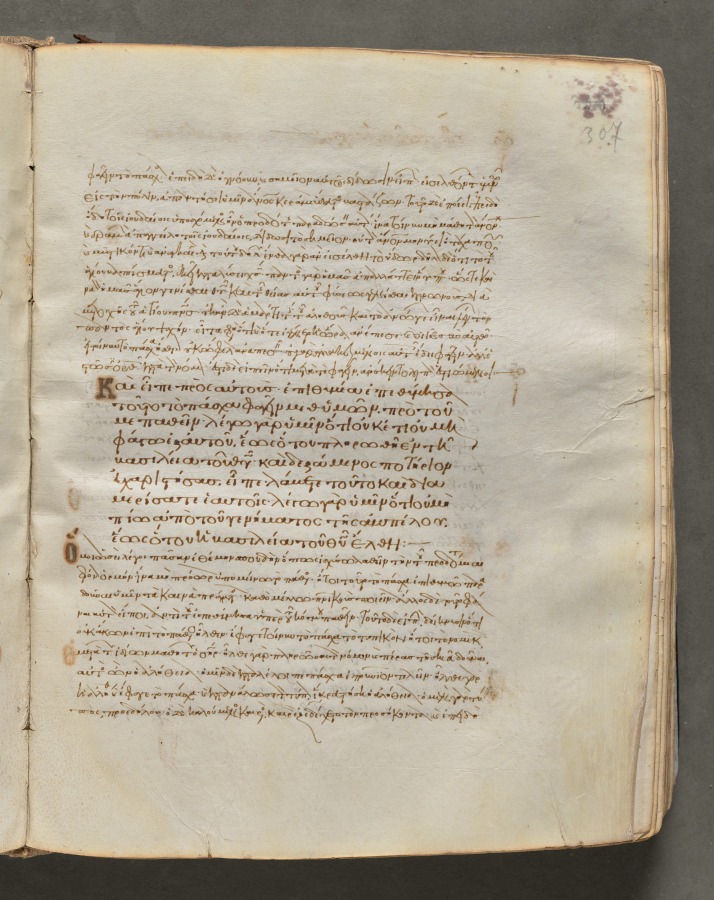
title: Text, folio 307 (recto), from a Gospel Book with Commentaries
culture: Byzantium, Constantinople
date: c. 1000–1100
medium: ink, tempera, and gold on vellum; leather binding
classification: Bound Volume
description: Each of the four gospels in this book opens on a page with brilliantly illuminated borders depicting the author of the text as well as birds—principally peacocks, symbols of the immortality of the soul—and fountains, representing the fountain of life and the salvation of the soul. This volume consists of 428 leaves with texts in Greek. Its level of sophistication suggests that it was probably written and decorated in a monastery in Constantinople.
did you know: Gospel books were carried in procession through Byzantine churches.